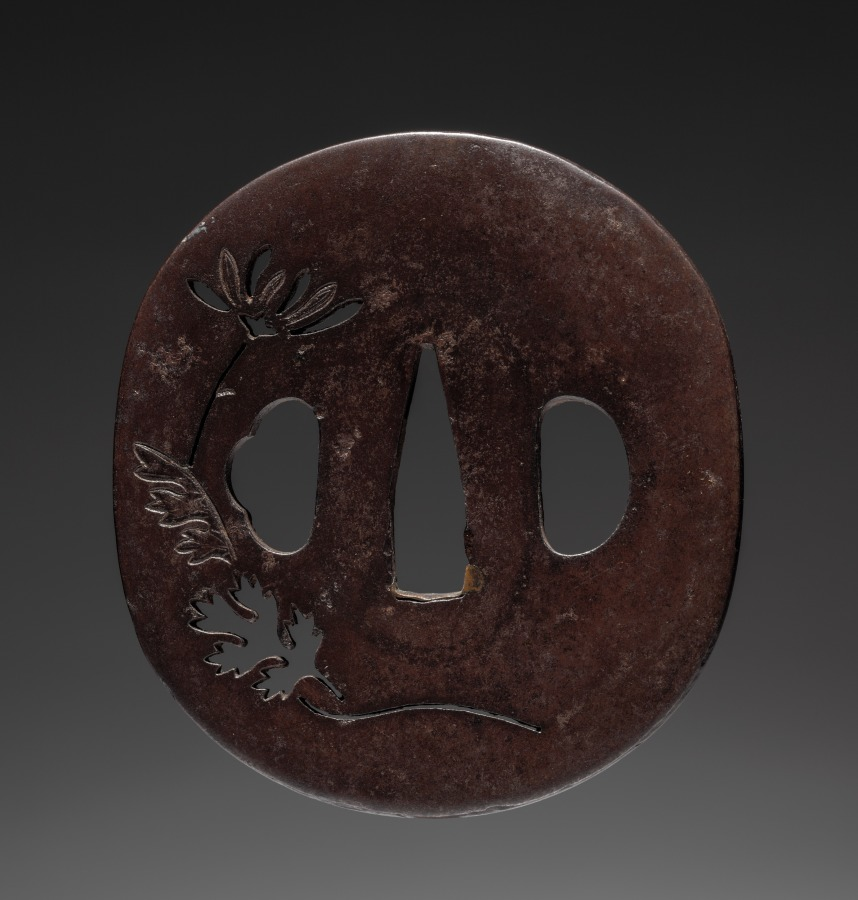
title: Sword Guard (Tsuba)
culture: Japan, Edo period (1615–1868)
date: early 1800s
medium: iron (Akao type)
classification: Arms and Armor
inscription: signed "Masamitsu, residing in Musashi province."